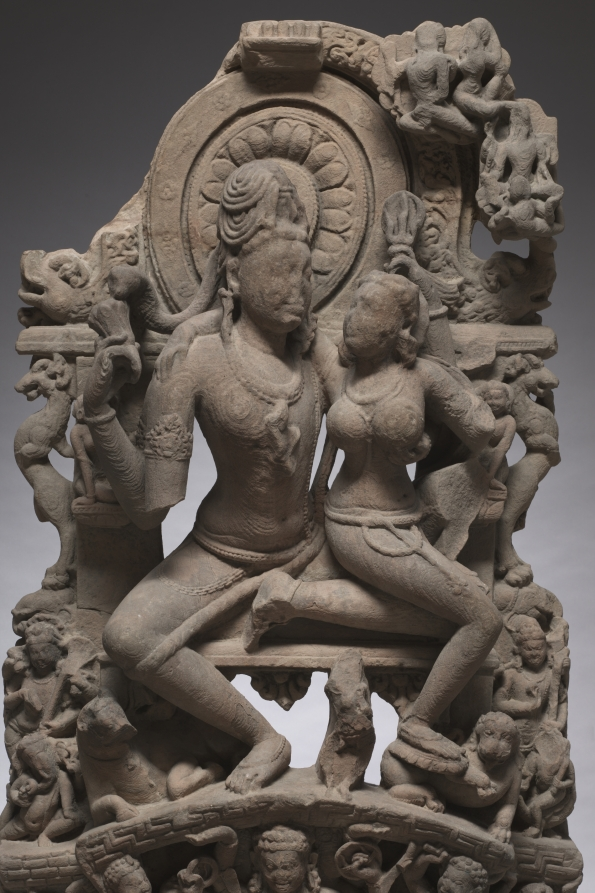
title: Ravana Shaking Mount Kailasa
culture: Central India, Madhya Pradesh, Chandela Dynasty, 8th century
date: 700s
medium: sandstone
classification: Sculpture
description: According to followers of the branch of Hinduism that considers Shiva to be the ultimate, original creator of the universe, he takes on a mythological form and resides in his created world. His home is in the Himalaya Mountains, on Mount Kailasa, where he lives with his wife Parvati. In one episode of Shiva's mythology, he presses down his big toe to quell the ten-armed demon Ravana, who tried to steal Mount Kailasa and take it away to his island. As Ravana was trying to shake the mountain loose, Parvati turned and clung to Shiva in fear— the moment depicted in this magnificent sculpture, which once formed part of a temple exterior. It is thought that Shiva created the world for the sake of his own enjoyment, his lila or divine play, and emanated himself into all the beings of creation: gods and demons, humans and animals. He shrouded their awareness of the reality that they were in essence the god Shiva himself, so that they would perform the actions of his cosmic drama.